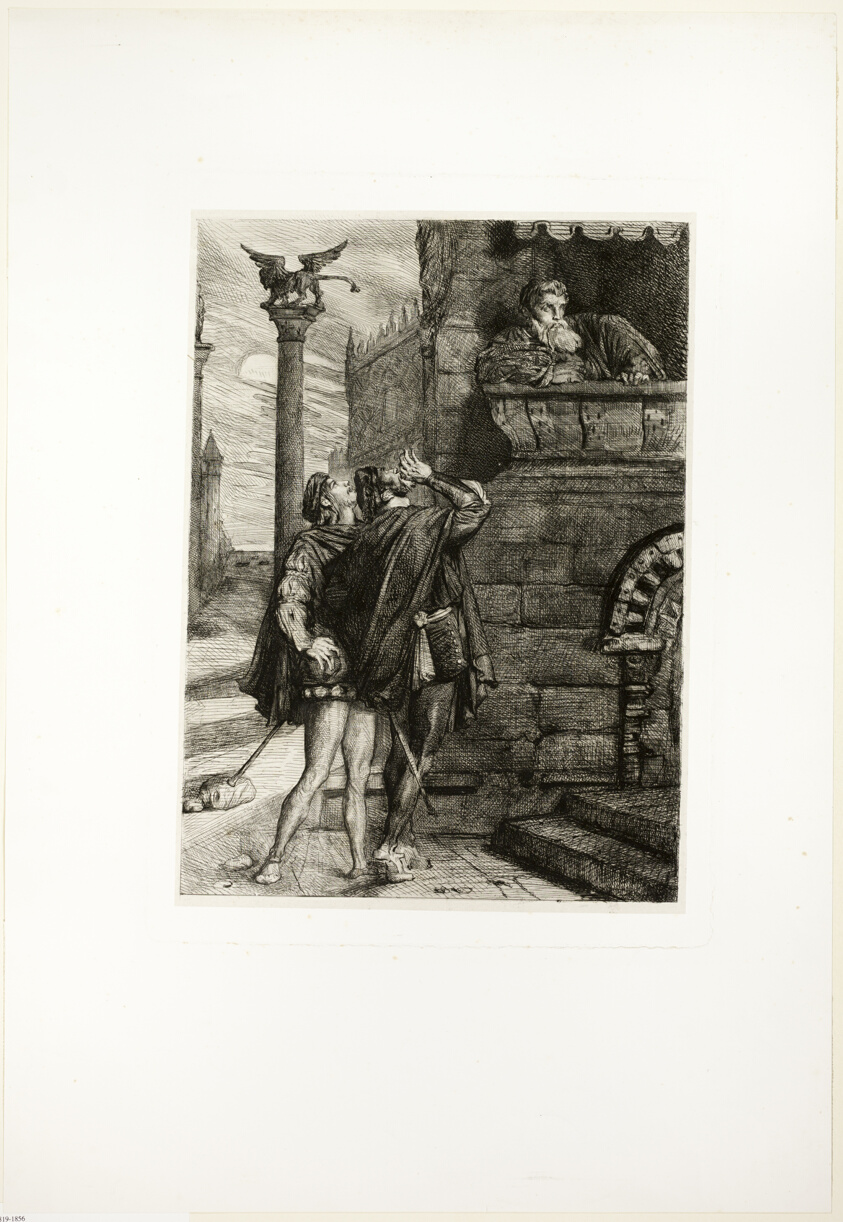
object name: Print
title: Owake! what ho! Brabantio! thieves! thieves!, plate one from Othello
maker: Théodore Chassériau (French, 1819-1856)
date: 1844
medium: Etching and drypoint on light gray China paper, laid down on white wove paper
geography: France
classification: etching; print; prints and drawing